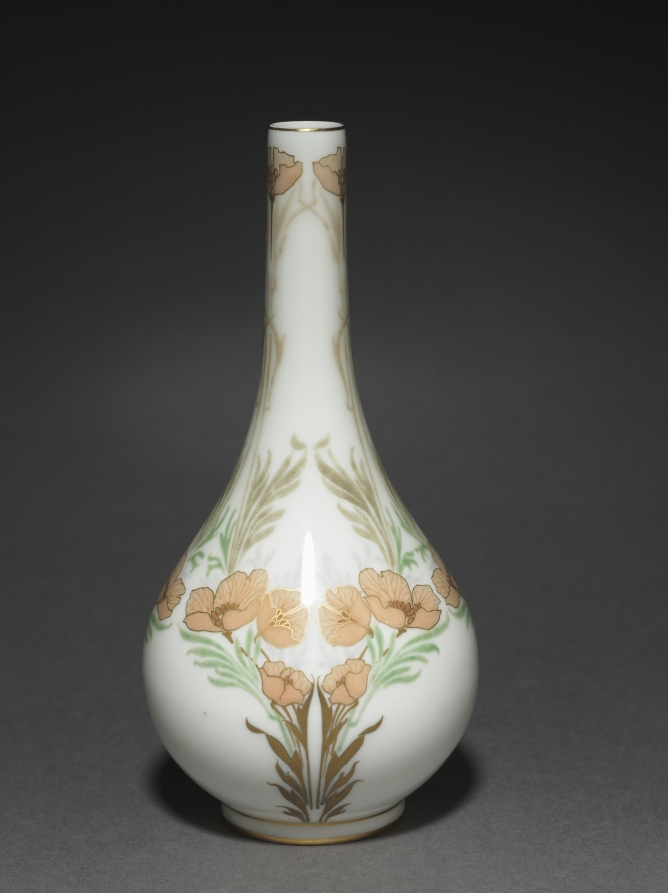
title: Vase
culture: France, Sèvres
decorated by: Jean-Charles-Hippolyte-Abel Leger (French)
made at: Sèvres Porcelain Factory (French, est. 1756)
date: 1905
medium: porcelain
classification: Ceramic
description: The shape of this vase, with its globular body and long neck, is influenced by the form of Chinese porcelain vases intended to hold singular flowers or branches. Delicate pink poppies with green and gold leaves decorate the vase.